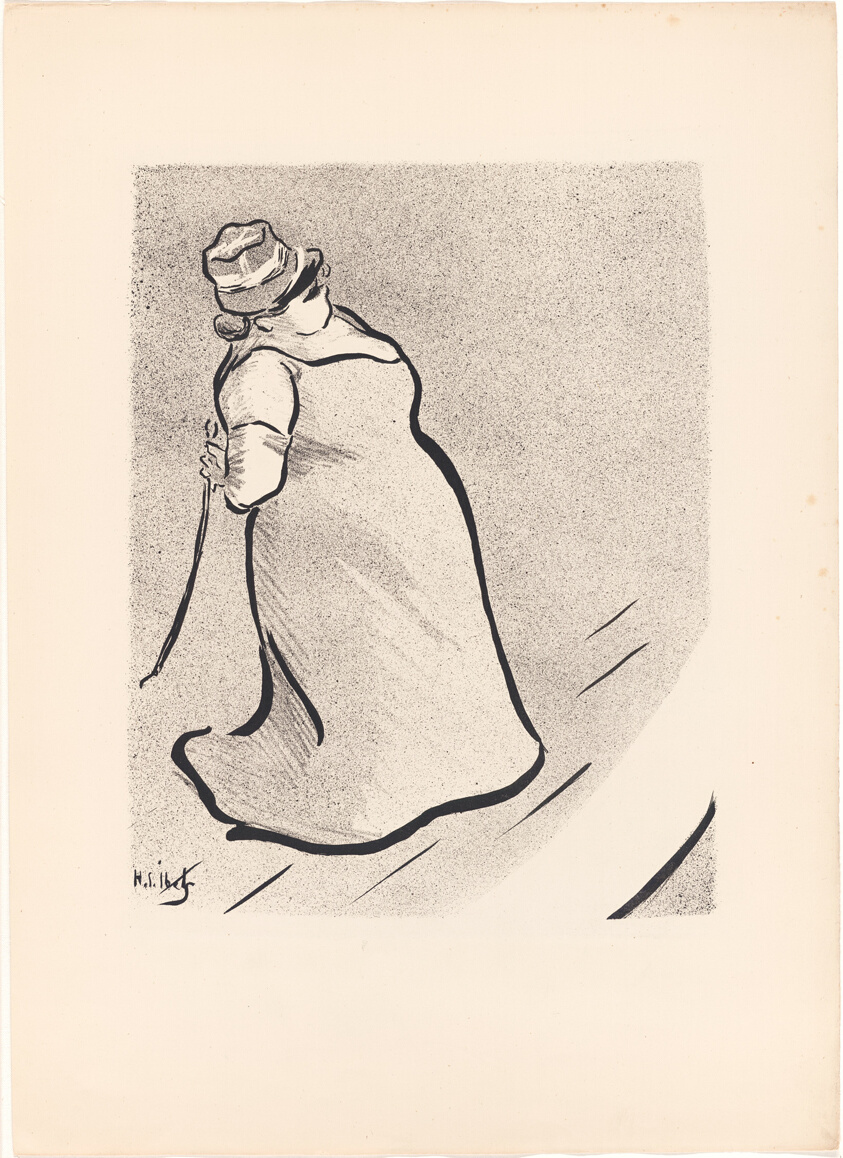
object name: Print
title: Jeanne Bloch, from Le Café-Concert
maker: Henri-Gabriel Ibels (French, 1867-1936); printed by Edward Ancourt & Cie (French, 19th-20th century); published by L'Estampe originale (French, 1893-1895)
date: 1893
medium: Lithograph on cream wove paper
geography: France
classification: lithograph; print; prints and drawing